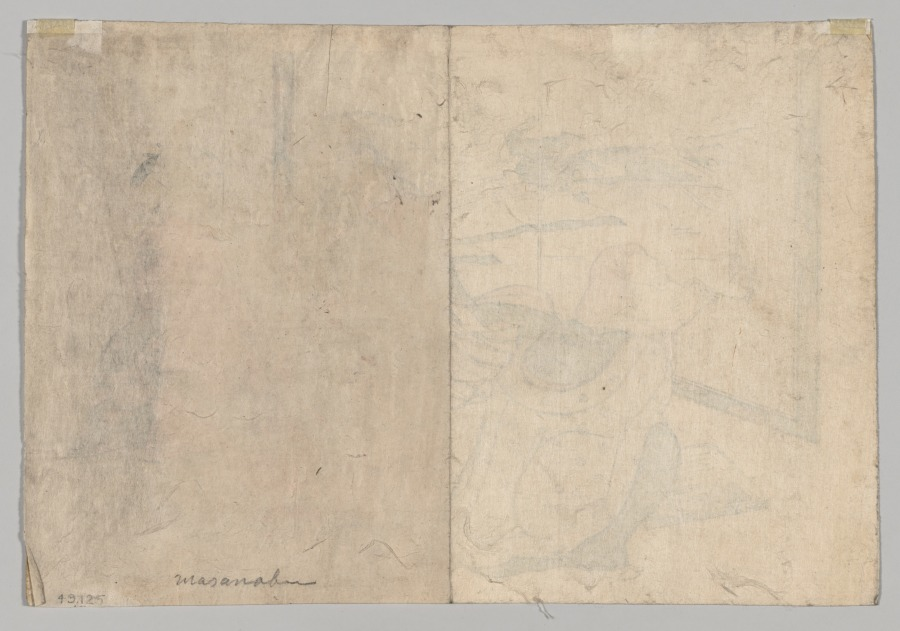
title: No Title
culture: Japan, Edo period (1615–1868)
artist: Okumura Masanobu (Japanese, 1686–1764)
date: 1742–1755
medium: color woodblock print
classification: Print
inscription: Signature: Okumura Masanobu, brush